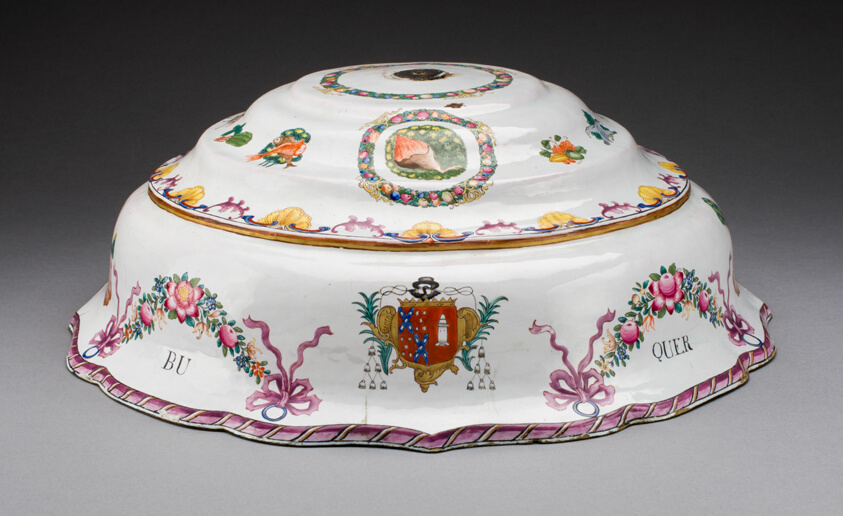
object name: Metalwork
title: Cover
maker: China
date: c. 1765, Qing dynasty (1644–1911), Qianlong reign mark and period (1736–95)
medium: Enameled copper decorated with canton enamels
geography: Junyao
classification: porcelain; european decorative arts; ceramics; metalwork